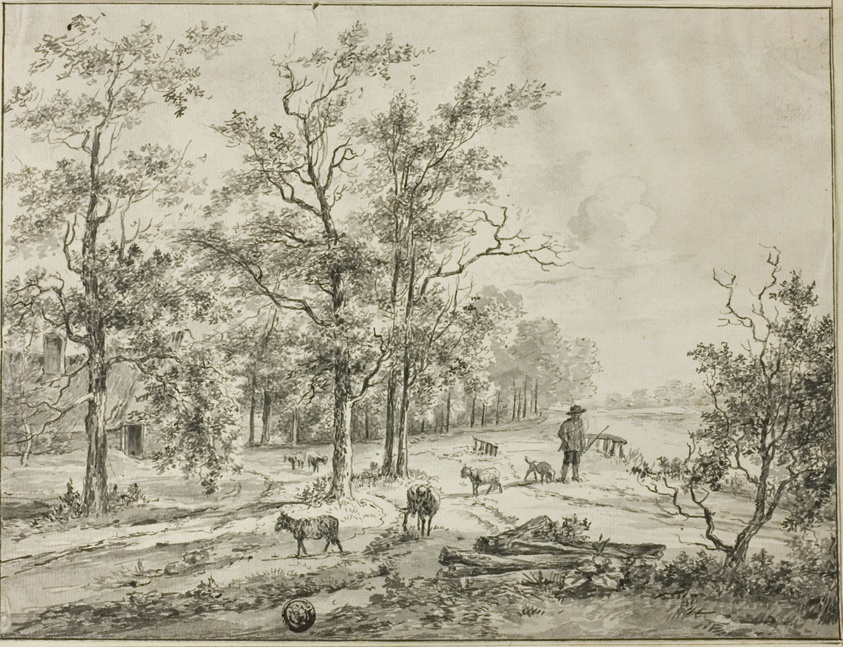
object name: Drawing and Watercolor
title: Goatherd and Goats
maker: Bruno van Straaten (Dutch, 1786-1870)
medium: Pen and black ink, with brush and gray wash, over traces of graphite, on ivory laid paper, tipped onto card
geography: Holland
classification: ink or chalk wash; drawings (visual works); prints and drawing